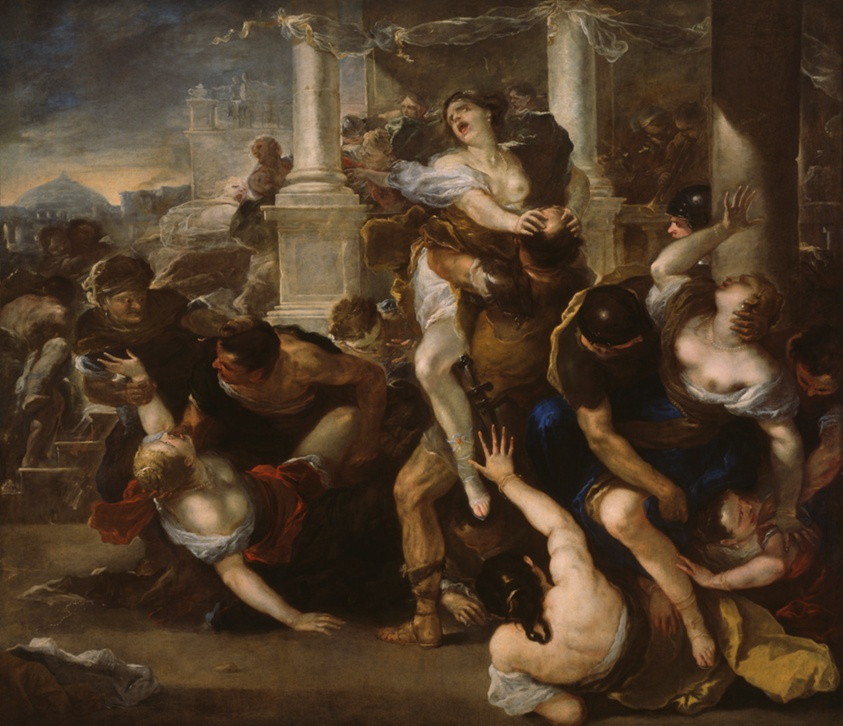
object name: Painting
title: The Abduction of the Sabine Women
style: 17th Century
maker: Luca Giordano (Italian, 1632–1705)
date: c. 1675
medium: Oil on canvas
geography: Italy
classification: oil on canvas; Italian; oil paintings (visual works); paint; painting; european painting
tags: mythology, gestural, festivals, night scenes, night, architechture, men, Rome, Roman, violence, women